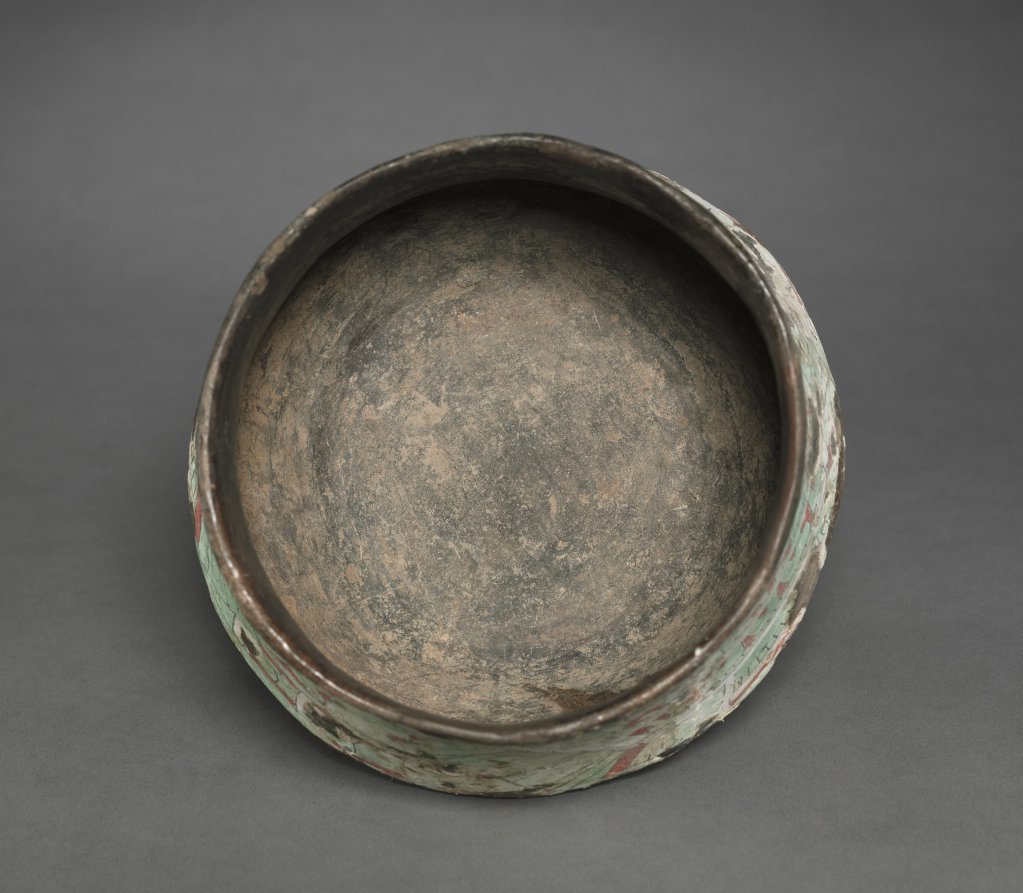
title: Vessel with Butterfly Headdress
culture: Central Mexico, Teotihuacán, Classic period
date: 1–550 CE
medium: ceramic, stucco, pigment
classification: Ceramic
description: The headdress shown on this vessel combines a serpent's mouth with a butterfly's proboscis (feeding tube), which curls between the eyes. The butterfly often appears in the headdress of the Great Goddess, an extremely important Teotihuacán deity. Stucco (paper-thin, painted plaster) is fragile and usually does not survive well; the stucco of the basin in this case has been repaired.